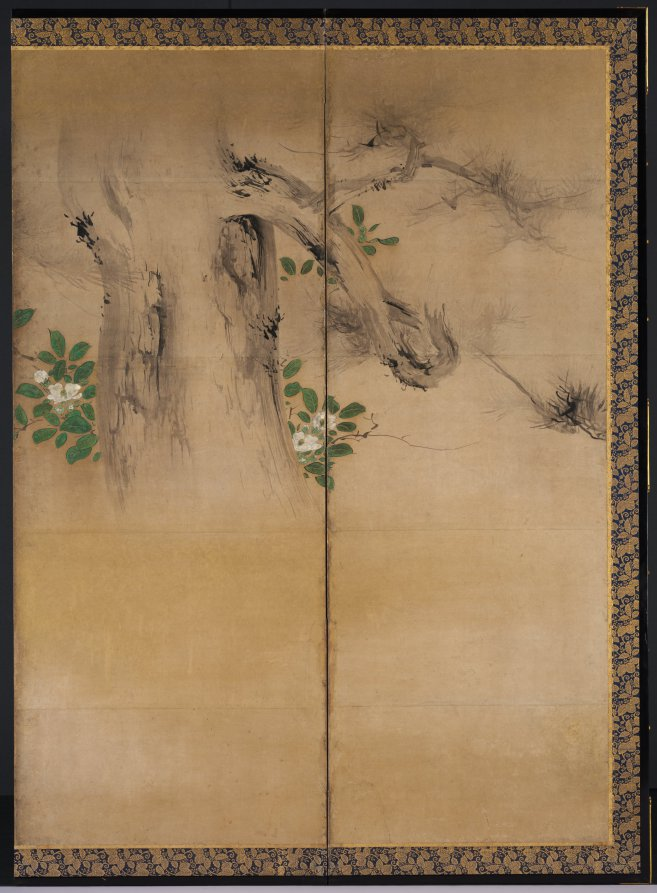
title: Winter and Summer Flowers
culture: Japan, Momoyama period (1573–1615)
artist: Kaihō Yūshō (Japanese, 1533–1615)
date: c. 1600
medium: One of a pair of six-panel folding screens; ink, color, and gold on paper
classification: Painting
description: White camellias bloom behind a large pine in the right screen and blue morning glories creep through bamboo in the left screen of this composition. The mountains and bridge suggest a continuous landscape, but the paintings actually juxtapose flowers of winter and summer, with time progressing from right to left. Kaihō Yūshō painted similar landscapes for Zen temples in Kyoto.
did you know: The pine and bamboo are defined by ink wash, but the flowers take form through color within contour lines.